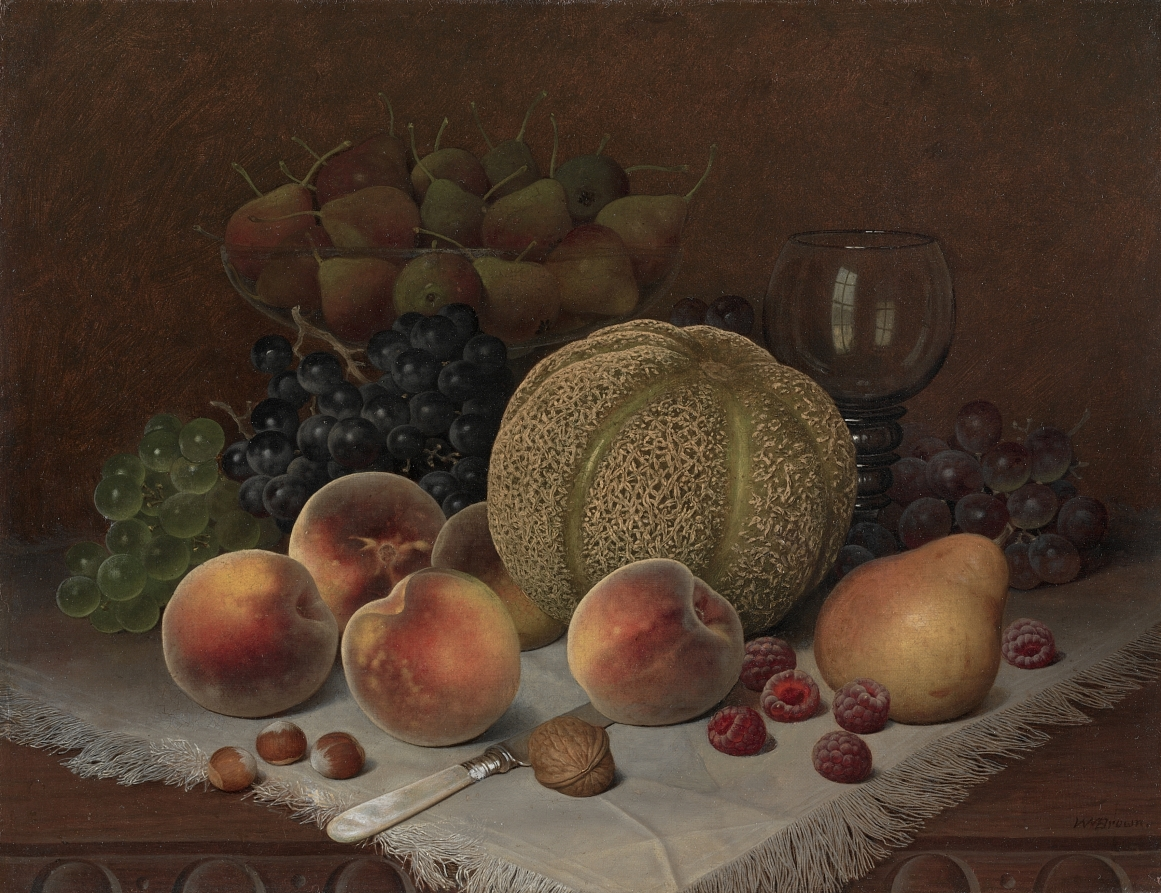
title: Still Life with Cantaloupe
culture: America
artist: William Mason Brown (American, 1828–1898)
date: c. 1880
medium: oil on canvas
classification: Painting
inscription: Signed lower right: "WM Brown. [WM in monogram]"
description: William Mason Brown launched his career as a portrait and landscape painter, but turned to still life subjects during the 1860s, which brought him success and renown. The various objects in this example are rendered in meticulous detail, capturing a range of textures from the soft fuzz of peach skin through the coarse webbing of cantaloupe rind.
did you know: Each peach, raspberry, and chestnut in this composition is painted from a different angle.